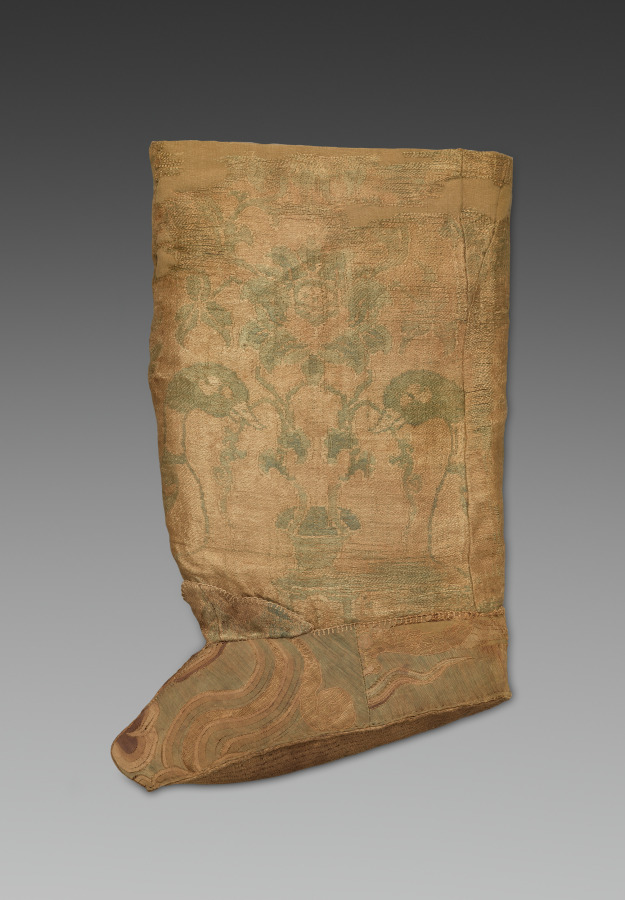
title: Pair of Boots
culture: China, Northern, Liao dynasty (907-1125)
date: 1000–1125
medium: Silk: compound twill; silk and gold: tapestry; silk: tabby, gauze, batting; leather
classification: Garment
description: The fabric and tailoring of garments have always defined social status. For these boots, different outer fabrics were used: a patterned silk for the leg portion, and tapestry (kesi) for the foot. Since both were considered luxury fabrics, they were pieced together from remnants too precious to discard. Consequently, the silk pattern was not used in relation to the form of the boot. By contrast, these boots would have been made for a court official, not a member of the imperial family. The patterned silk was woven with geese flanking a vase of flowers on a stand and surrounded by cloud scrolls. The Chinese motif of flowers arranged in a vase was adopted by the Liao during the 11th century and indicates an 11th- or early 12th-century date for the boots.